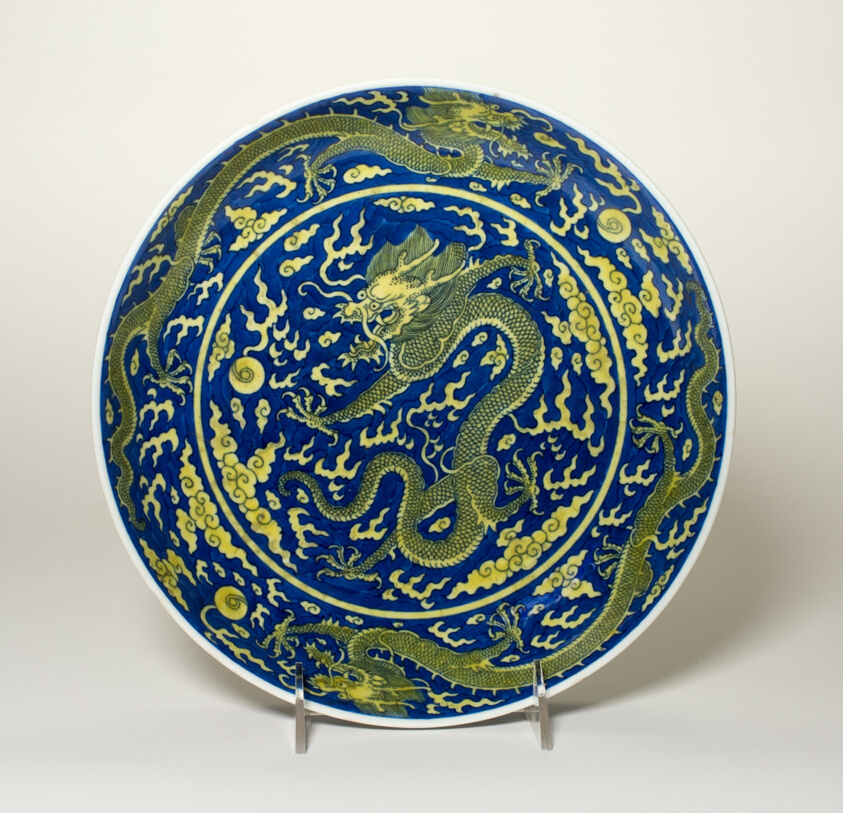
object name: Vessel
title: Dish with Dragons amid Clouds, Chasing Flaming Pearls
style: Chinese (culture or style)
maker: China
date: Qing dynasty (1644–1911), Jiaqing reign mark and period (1796–1820)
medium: Porcelain painted in underglaze blue and overglaze yellow enamel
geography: China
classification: dish (vessel); porcelain; asian art; ceramics; vessel